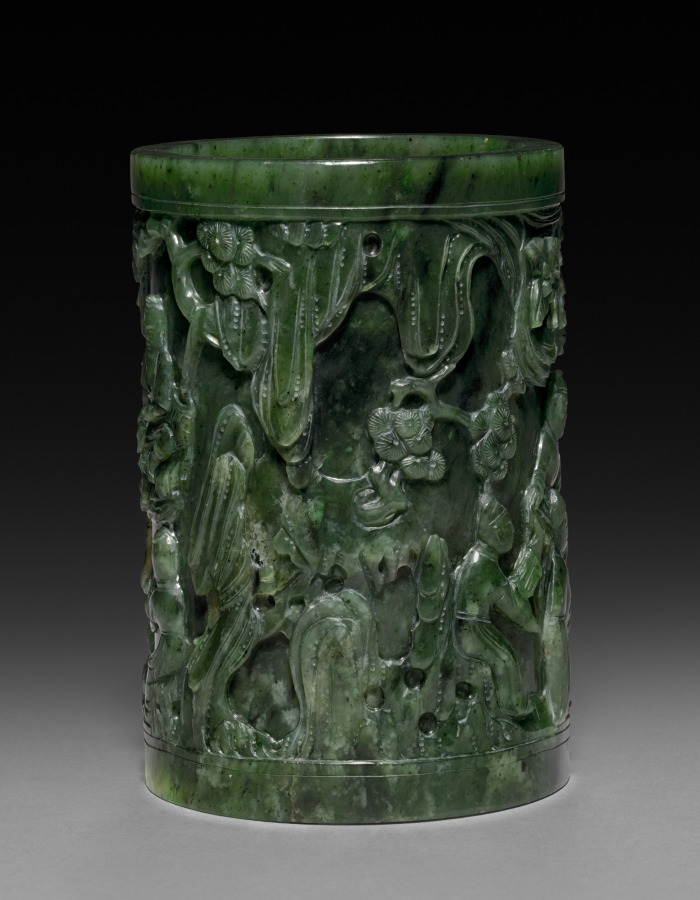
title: Brush Holder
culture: China, Qing dynasty (1644-1911)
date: 1800s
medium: spinach jade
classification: Jade